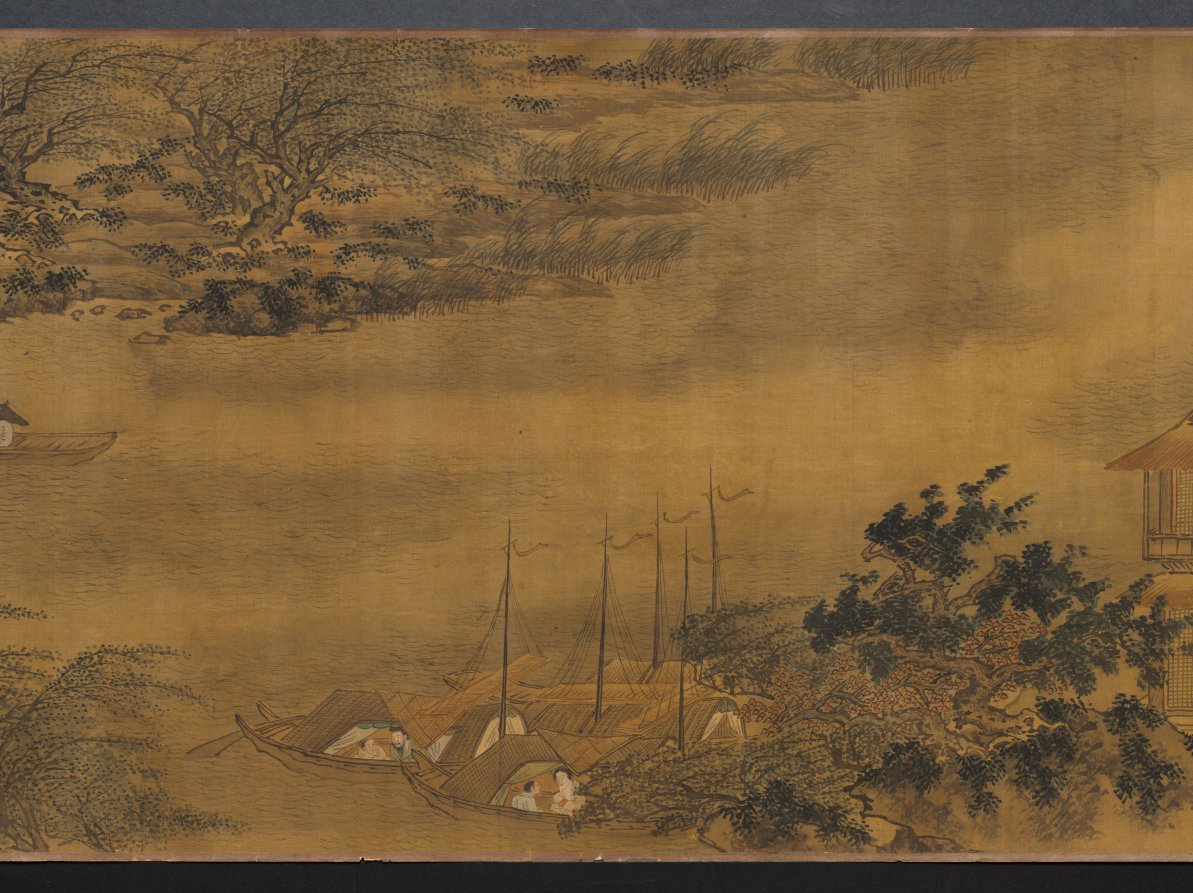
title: Returning to the Village in a Rainstorm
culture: China, Ming dynasty (1368–1644)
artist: Xie Shichen (Chinese, 1487–after 1567)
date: 1530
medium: Handscroll; ink and light color on silk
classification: Painting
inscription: 風雨歸村圖 嘉靖庚寅秋日樗仙謝時臣. [印] 謝時臣印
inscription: 3 additional seals unidentified.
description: This scroll depicts a wind- and rainswept landscape with figures in the countryside struggling against a late summer monsoon rainstorm. Such weather was familiar to residents of the lower Yangzi delta. Xie Shichen spent most of his life in the Suzhou area. Details of his career are scant, but his surviving works suggest that he made his living as a professional painter. This painting conveys drama and anecdotal observations, characteristic of Zhe school paintings, such as the one by Lü Wenying, CMA 1970.76.